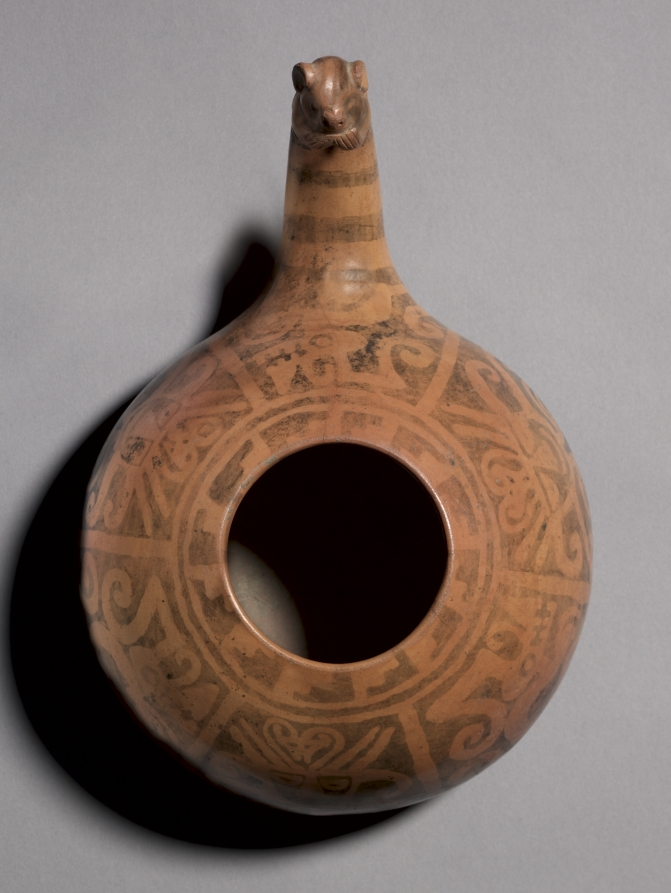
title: Dipper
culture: Peru, North Highlands, Recuay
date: 100 BCE–700 CE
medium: ceramic, slip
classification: Ceramic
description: Both of these objects feature a creature known as the "Recuay feline," although it could also refer to a fox, dog, or viscacha (a rodent). Whatever its identity, the prominent crest on its head ties it to the supernatural realm, a connection underlined by the deity head that also appears on the dipper and by the ritual function of snuff tablets, which were used to inhale hallucinogenic snuffs during religious ceremonies.